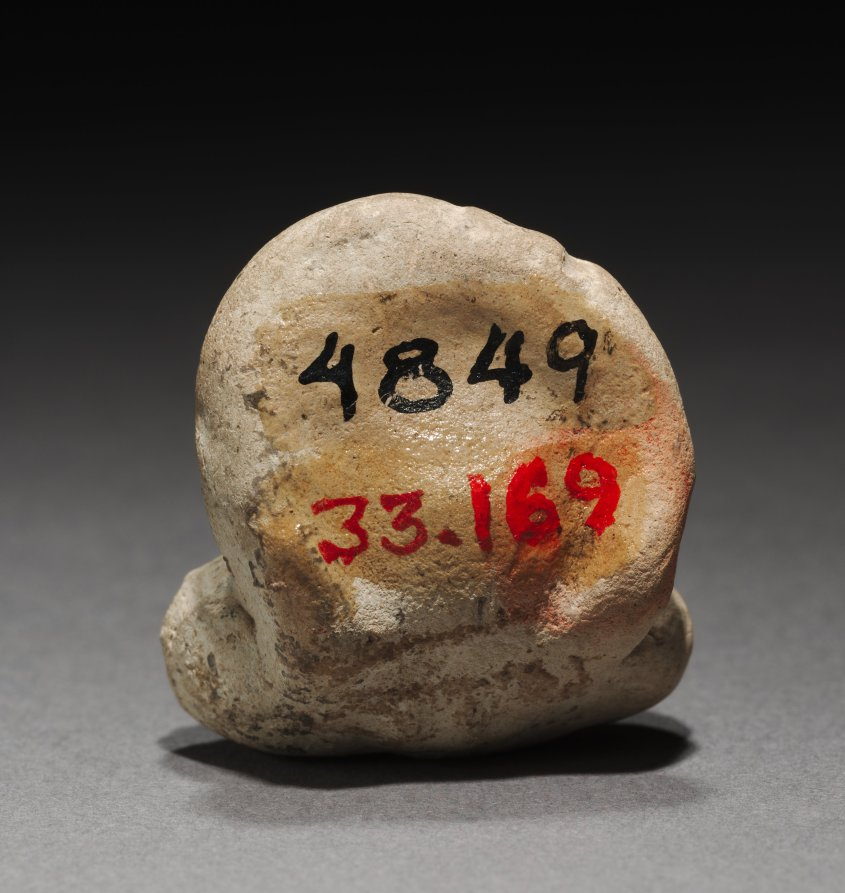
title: Head of a Goddess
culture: Parthian Empire (247 BCE–224 CE)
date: 1–200 CE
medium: terracotta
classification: Sculpture